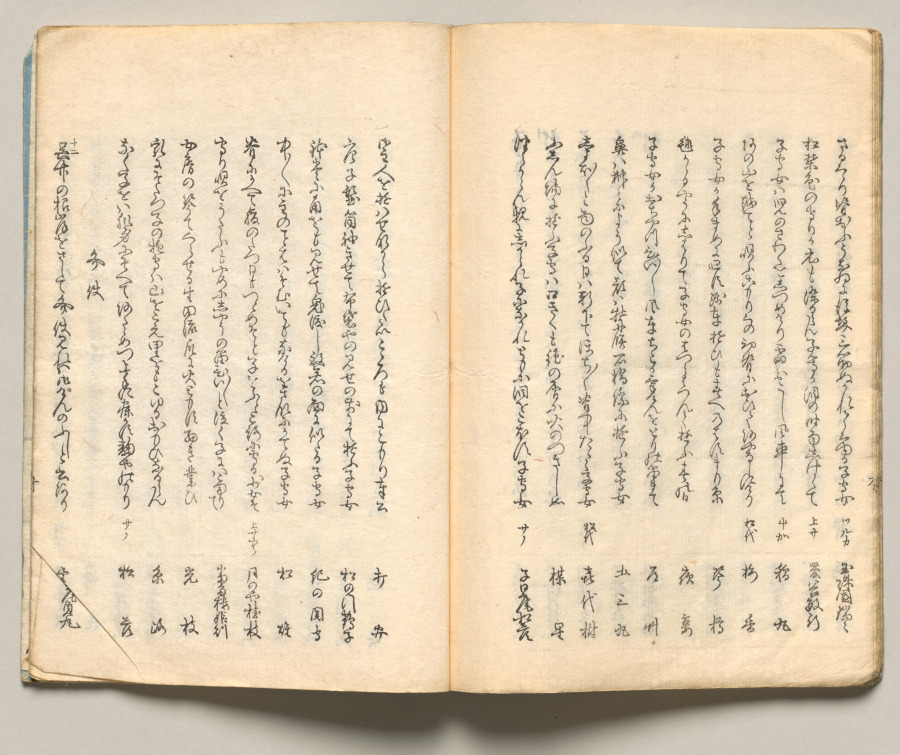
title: Spread Seventeen from Volume Six of People of Japan in Light Verse (Kyōka)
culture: Japan, Edo period (1615–1868)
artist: Utagawa Hiroshige (Japanese, 1797–1858)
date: 1857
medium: Woodblock-printed book; ink and color on paper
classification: Bound Volume